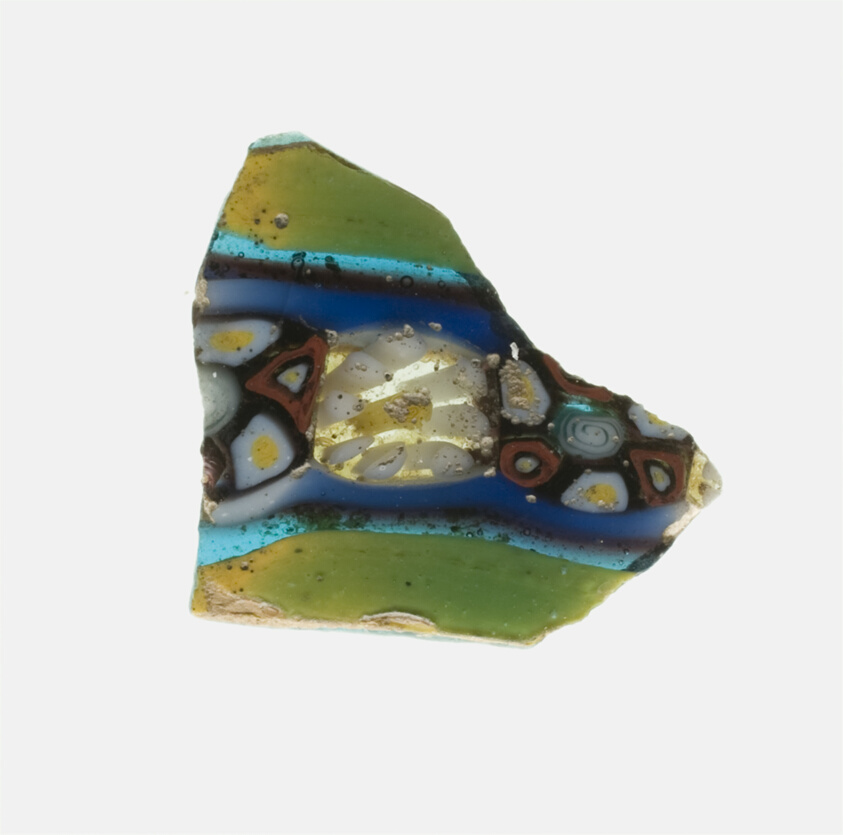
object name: Decorative Arts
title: Fragment of an Inlay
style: roman (ancient, style or period), ancient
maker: Roman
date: 1st century BCE–1st century CE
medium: Glass, core-formed technique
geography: Roman Empire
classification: fragment; decorative arts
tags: decoration